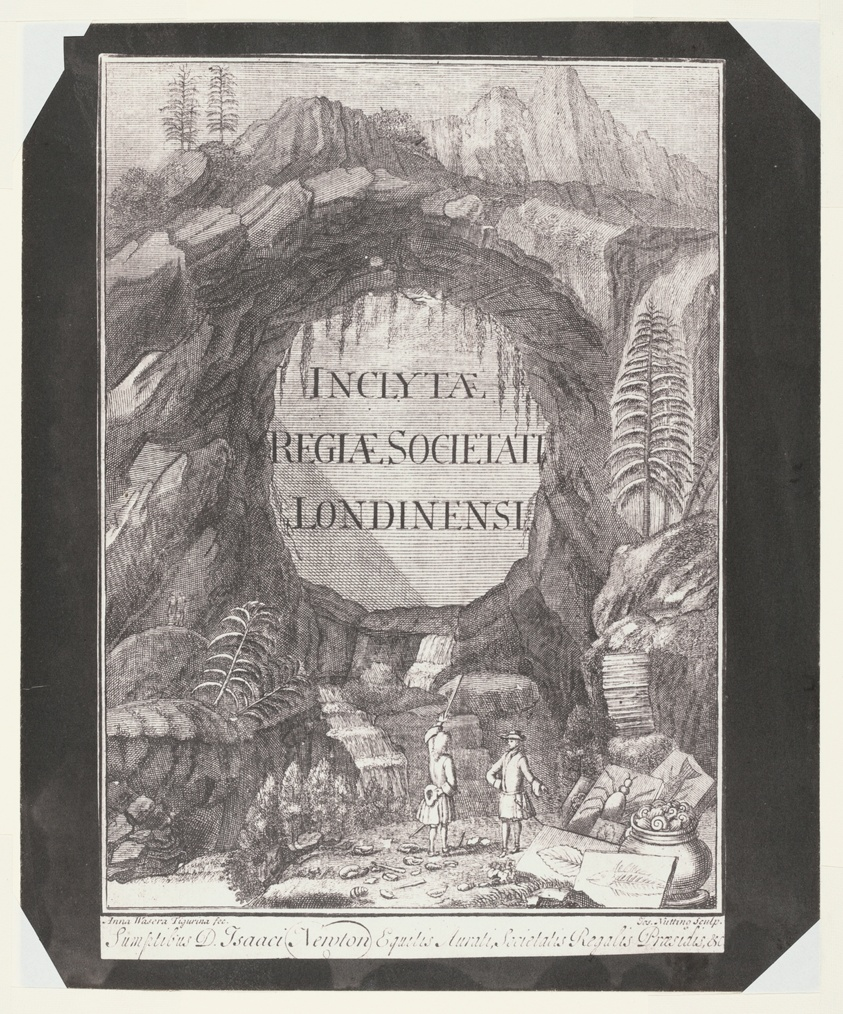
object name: Photograph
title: Copy of the Title Page for "Inclytae Regiae Societati Londinensi"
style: 19th century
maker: William Henry Fox Talbot (English, 1800–1877)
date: c. 1840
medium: Salted paper print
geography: England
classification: salted paper print; photographic process; photography; photograph